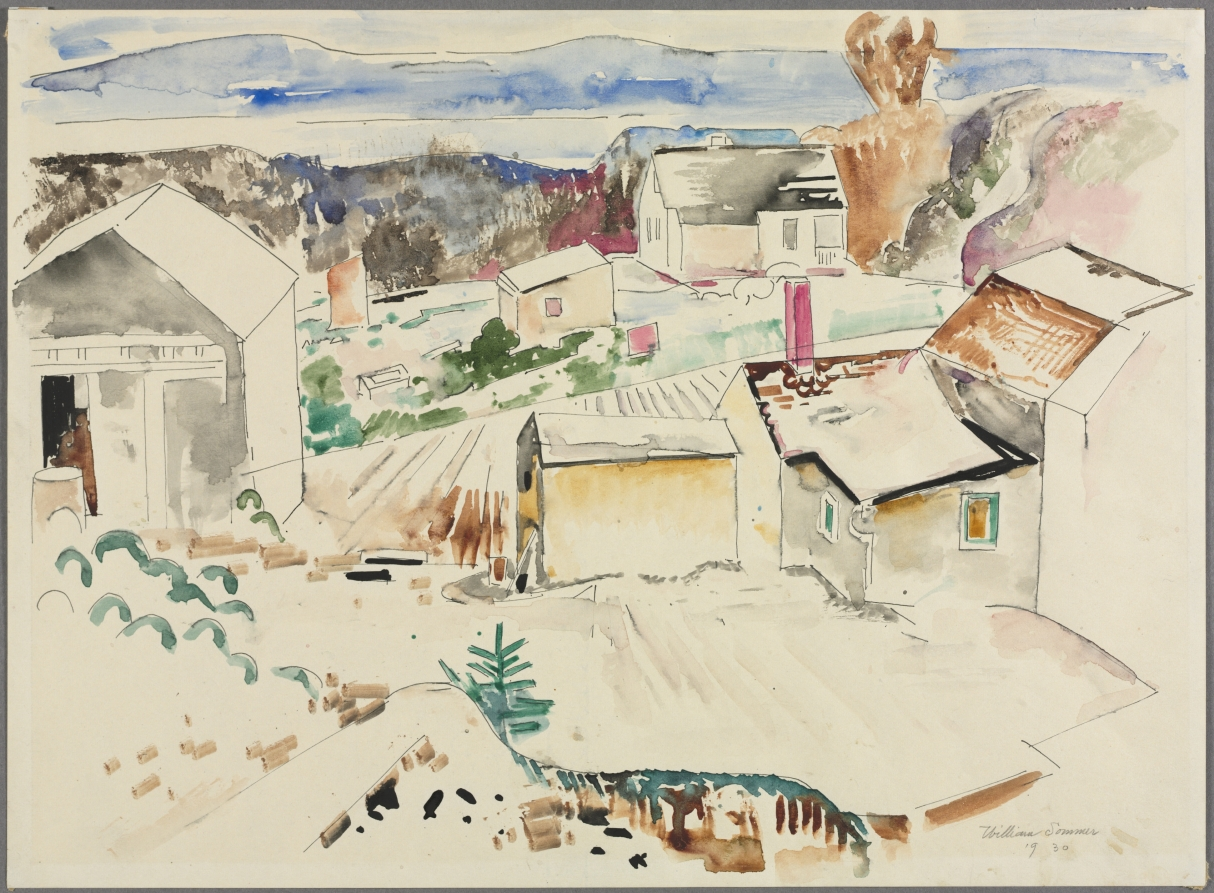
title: Winter, No. 1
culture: America, Ohio, Cleveland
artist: William Sommer (American, 1867–1949)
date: 1930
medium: watercolor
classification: Drawing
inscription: Signed "William Sommer, 1930" lower right